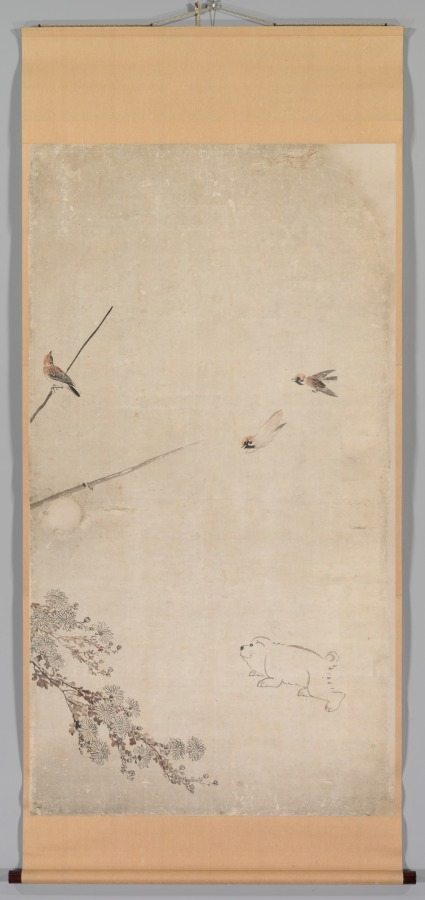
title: Puppies, Sparrows, and Chrysanthemums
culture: Japan, Edo period (1615–1868)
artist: Nagasawa Rosetsu (Japanese, 1754–1799)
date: c. 1792–94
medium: Fusuma panel remounted as a hanging scroll; ink and slight color on paper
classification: Painting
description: These paintings were originally mounted as sliding doors (fusuma) used inside a building. The circular areas on the paintings’ paper surfaces are traces of the former positions of the door pulls (hikite). A flock of sparrows gathers on a trellis supporting flowering chrysanthemum. Below is a litter of puppies, some cavorting, others napping. The tender story created by the curious puppy peering up and tilting its head to listen to the bird’s insistent call (in the leftmost part of the composition) is characteristic of Nagasawa Rosetsu’s paintings, which often use animals to illustrate the human condition.